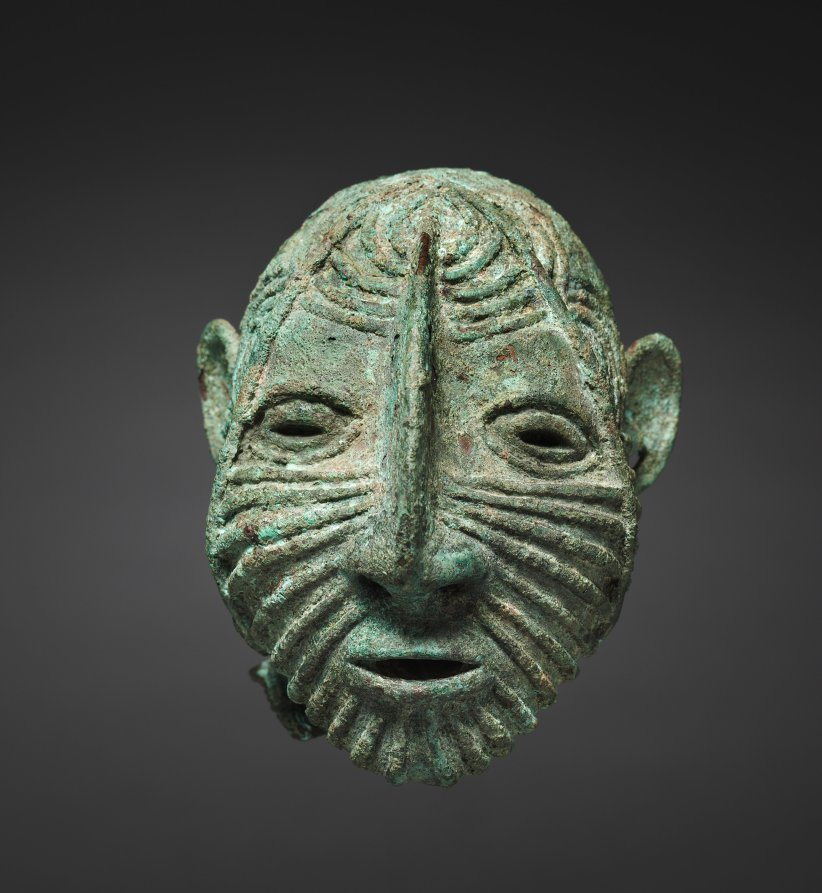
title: Male Head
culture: South East Asia, Thailand, Ban Chiang, Neolithic period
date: c. 1000 BCE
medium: bronze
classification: Sculpture